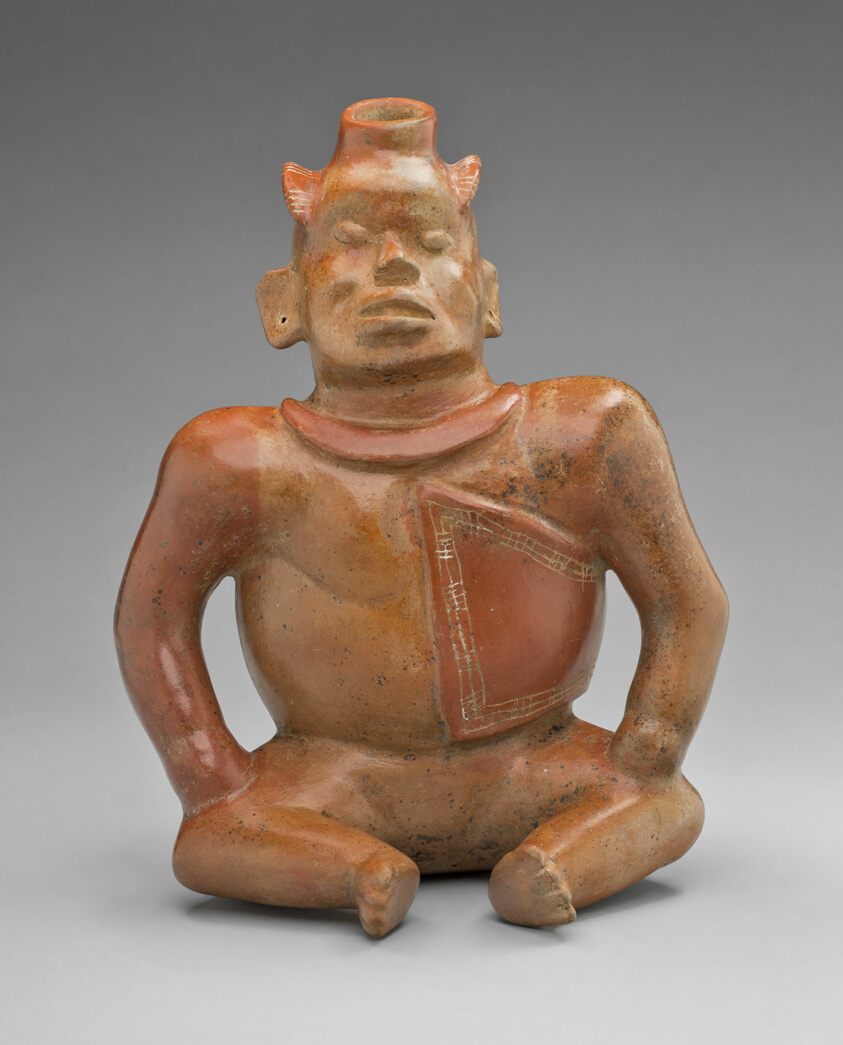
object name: Vessel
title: Vessel in the Form of a Seated Hunchback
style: colima, mesoamerican, Arts of the Americas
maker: Colima (Colima, Mexico)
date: 100 BCE–250 CE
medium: Ceramic and pigment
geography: Colima state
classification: vessel; art of the americas; ceramics